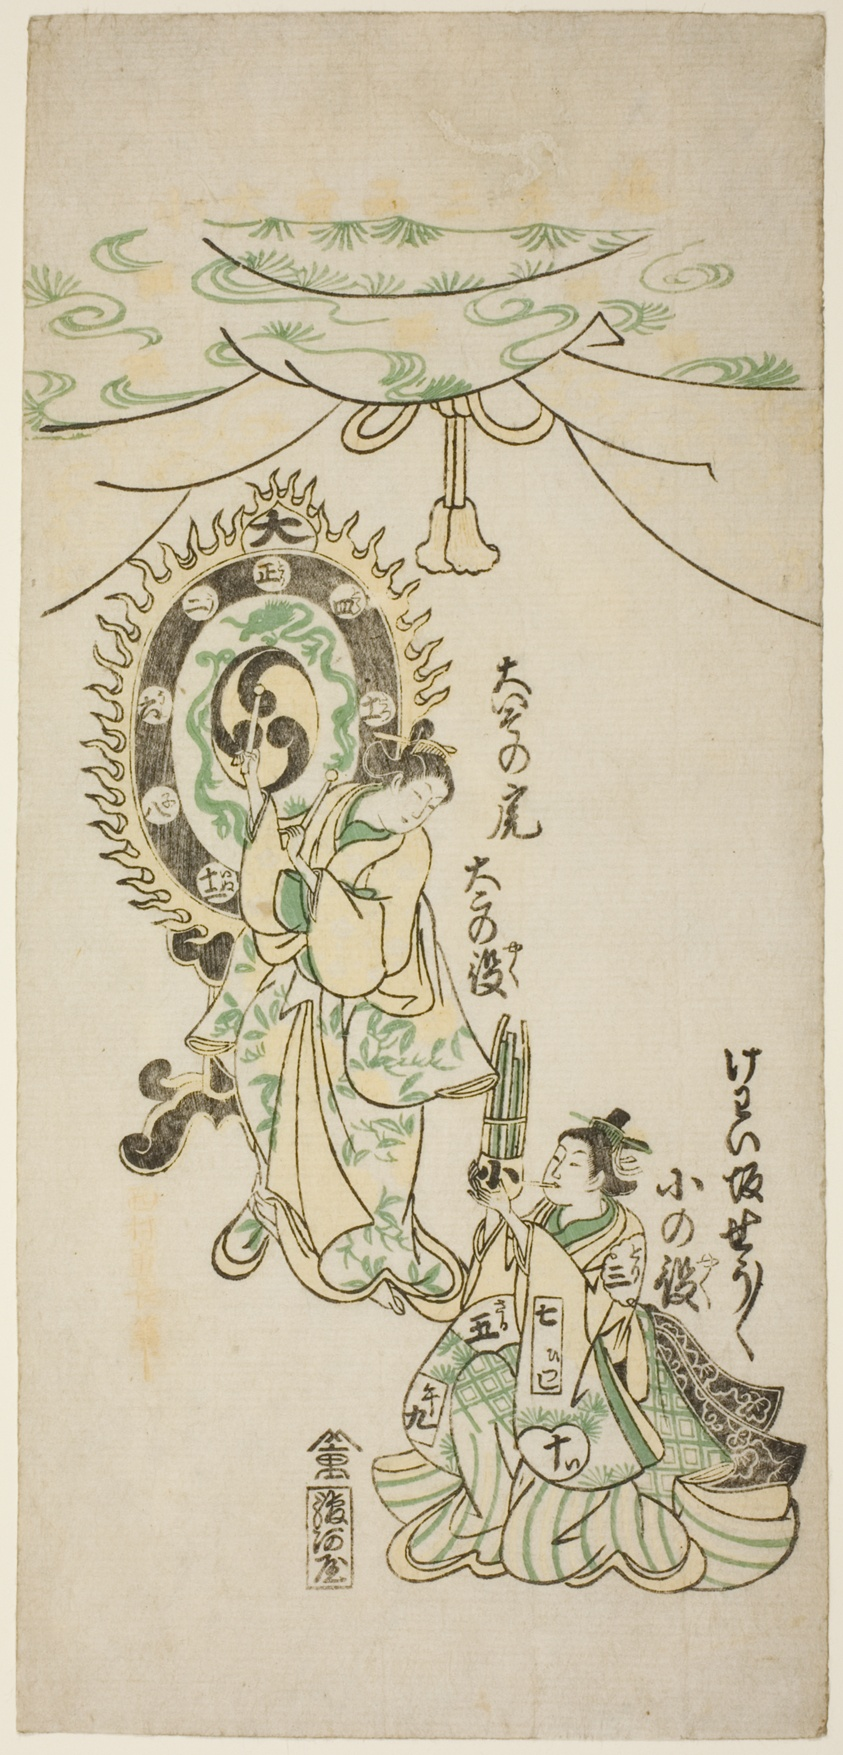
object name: Print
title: Oiso no Tora and Shosho Playing Instruments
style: Japanese (culture or style)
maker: Nishimura Shigenaga (Japanese, 1697 (?)-1756)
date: 1746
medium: Color woodblock print; hosoban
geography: Japan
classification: woodblock print; print; asian art